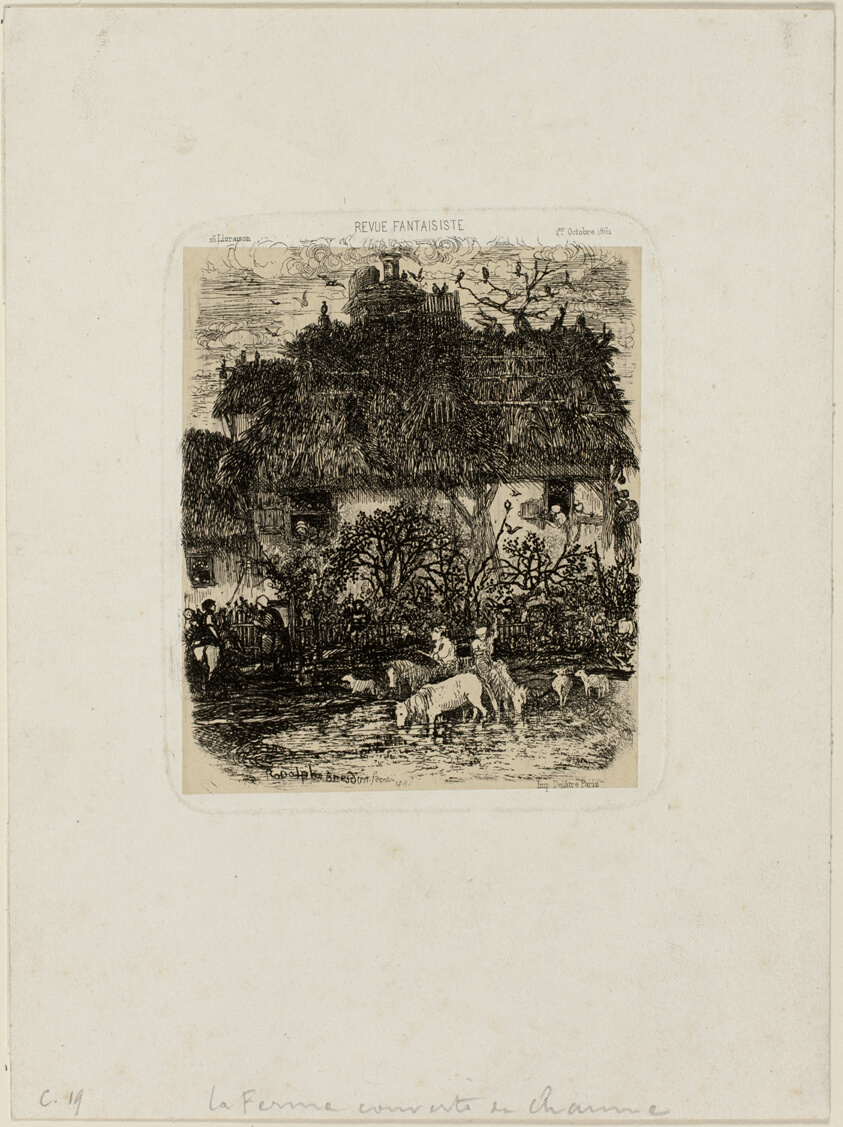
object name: Print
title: The Thatch-Roofed Farmhouse, from Revue Fantaisiste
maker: Rodolphe Bresdin (French, 1825-1885)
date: 1861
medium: Etching on cream China paper laid down on white wove paper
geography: France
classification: etching; print; prints and drawing